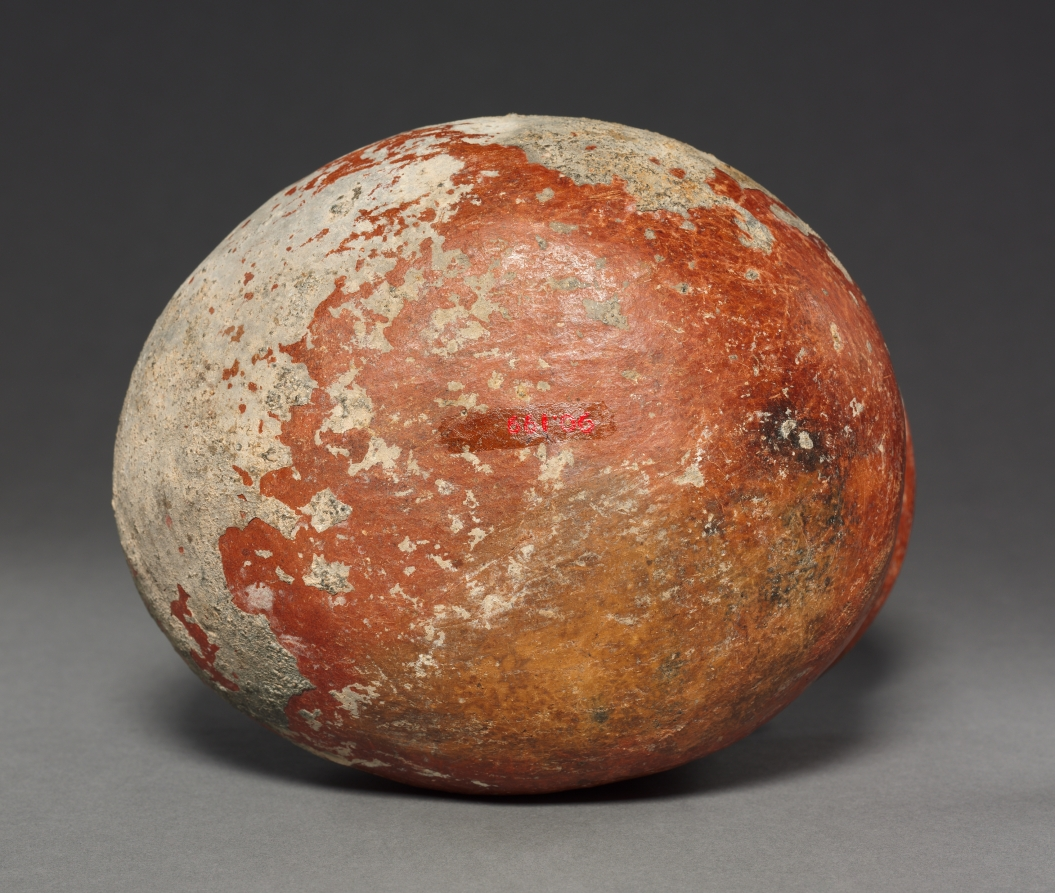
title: Head Effigy Bowl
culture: Mexico, Region of Tilantongo, District of Tlaxiaco, Nayarit style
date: 100 BCE–300 CE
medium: pottery with burnished red slip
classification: Ceramic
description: After about 200 BC, West Mexican chieftains gained in authority, their new status reflected in shaft tombs that shelter not only their remains but also lavish offerings, including sculptural ceramics. Many of the ceramics may refer to the crucial activities of a chief’s life, such as marriage, feasting, and war. The meaning of this unusual bowl—a head whose gaping mouth serves as the aperture—is unknown.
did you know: Diego Rivera and Rufino Tamayo were avid collectors of ancient Nayarit art.